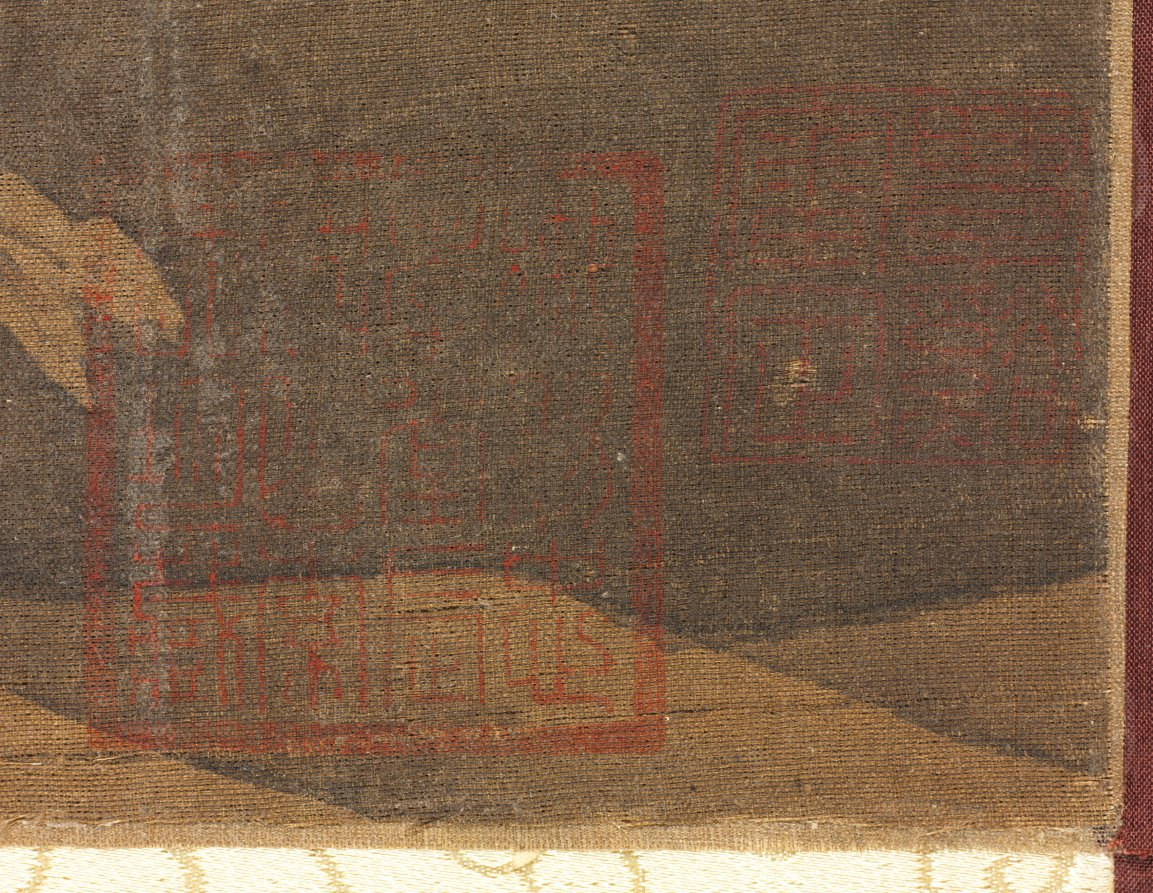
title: Birds in a Grove in a Mountainous Winter Landscape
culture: China, Jin dynasty (1115-1234)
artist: possibly by Gao Tao (Chinese, 1100s)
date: 1100s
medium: hanging scroll; ink and slight color on silk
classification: Painting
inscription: A signature and a seal at lower left edge: Gao Tao 高燾; seal undecipherable. 10 additional seals: 1 of Zhu Gang 朱棡 [1358–1398]; 3 of Suo’etu 索額圖 [1636–1703]; 2 of A’erxipu 阿爾喜普 [1700s]; 1 of Weng Fanggang 翁方綱 [1733–1818]; 3 unidentified.